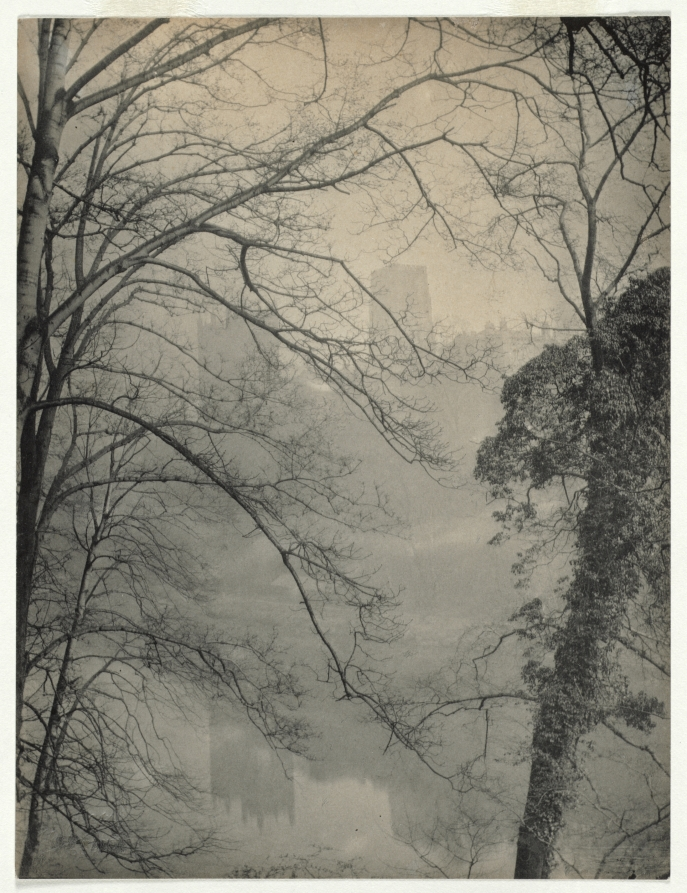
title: Durham Cathedral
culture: England, 20th century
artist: John R. Edis (British)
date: 1890s-1930s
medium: platinum print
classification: Photograph